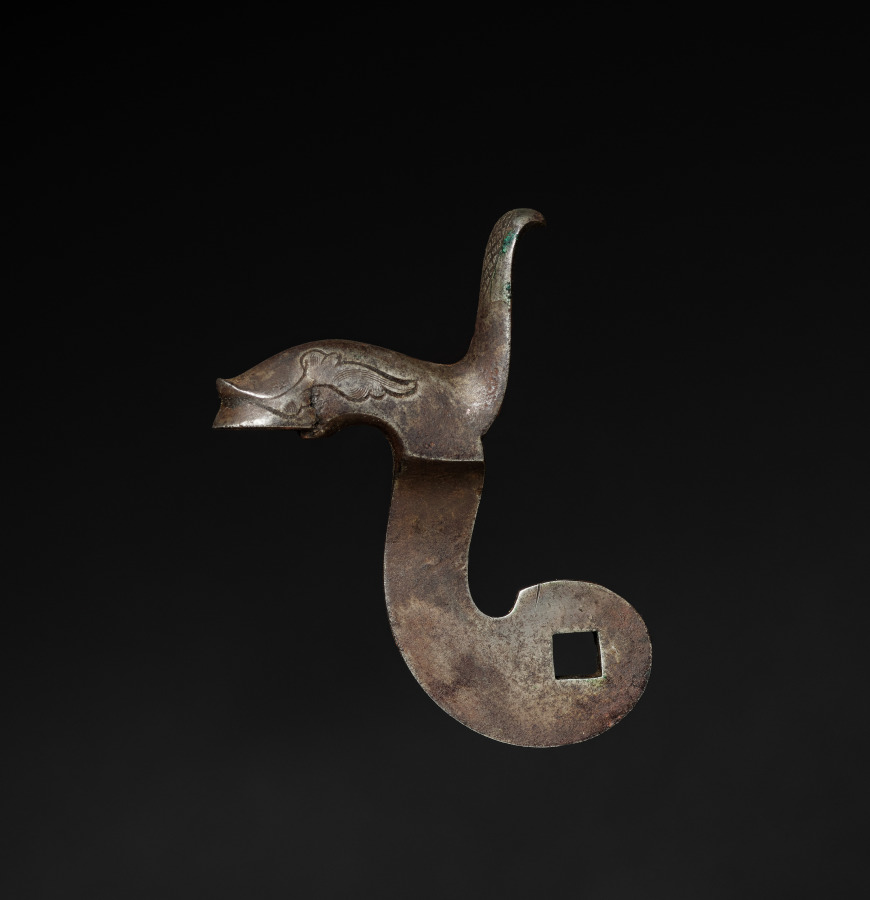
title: Gun-Lock Hammer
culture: England, early 19th century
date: c. 1800–1825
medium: steel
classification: Arms and Armor